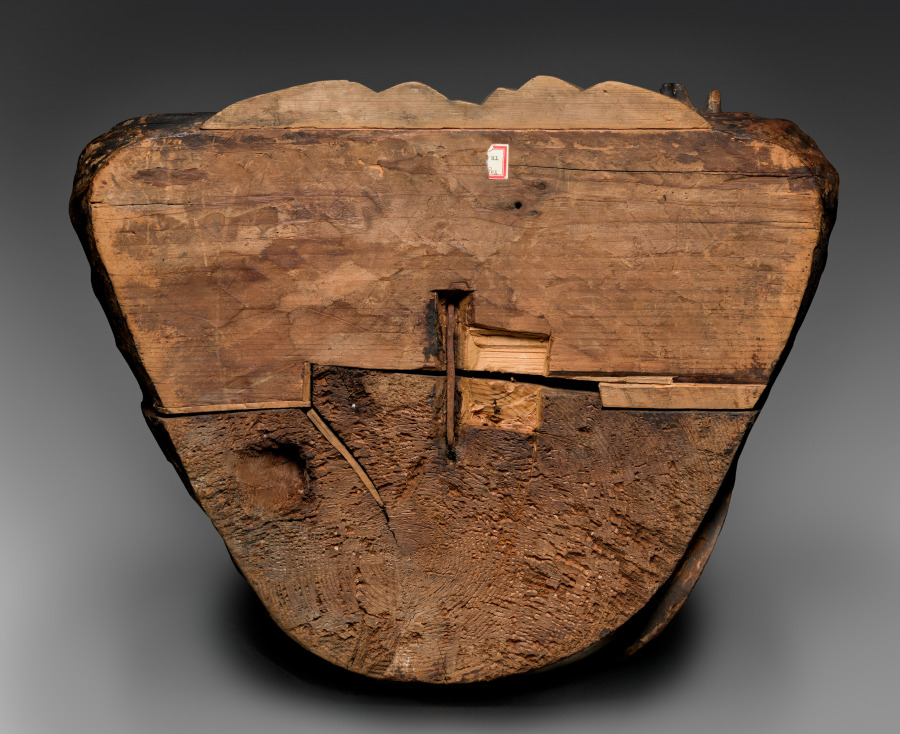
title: Shakyamuni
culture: Japan, Heian period (794–1185)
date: c. 900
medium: wood with lacquer and traces of color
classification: Sculpture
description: This image of Shakyamuni, the Buddha, or “awakened one,” who lived during the 500s or 400s BCE, is carved from one piece of wood. The distinctive pattern of thick, raised garment folds is characteristic of Japanese Buddhist sculpture of the 800s and 900s. Shakyamuni’s elongated ears and curled hair are among the physical attributes described in sacred texts that distinguish him as a Buddha.